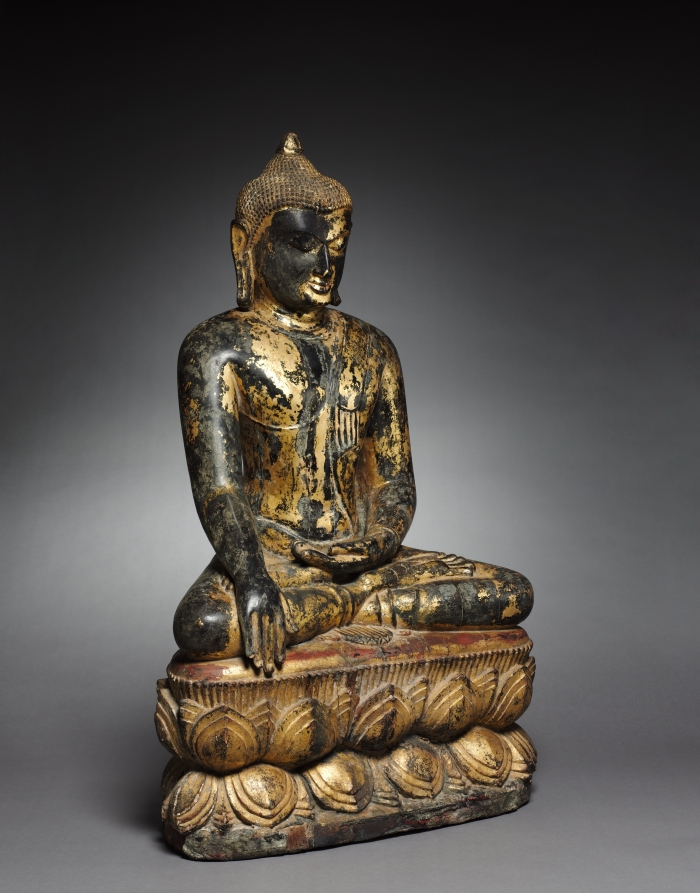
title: Seated Buddha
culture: Burma (Myanmar)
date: 1100s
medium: Gilt lacquer on solid wood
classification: Lacquer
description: This rare image of the historical Buddha Shakyamuni is shown seated with crossed legs in the position of meditation. His left hand rests on his lap, referring to his meditation under the Bodhi tree, and his right hand is in the earth-touching gesture—calling the earth to witness his enlightenment. The Buddha sits on a double lotus pedestal that indicates the presence of a transcendent being. The sculptural style is typical of sculptures made at the Buddhist site of Pagan. Sculptures such as this were installed in niches in an interior passage of a temple. As is typical of Burmese works, this sculpture was carved from a solid piece of wood. Its surface was covered in black lacquer and then gilded; a great deal of the gilding remains intact. Because lacquer is an easily perishable material, works of this type and size are exceedingly rare; this sculpture is one of the best extant examples.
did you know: The parallel lines with heart-shaped ends near the Buddha's ankles are the rippling pleats of his garment's hem.